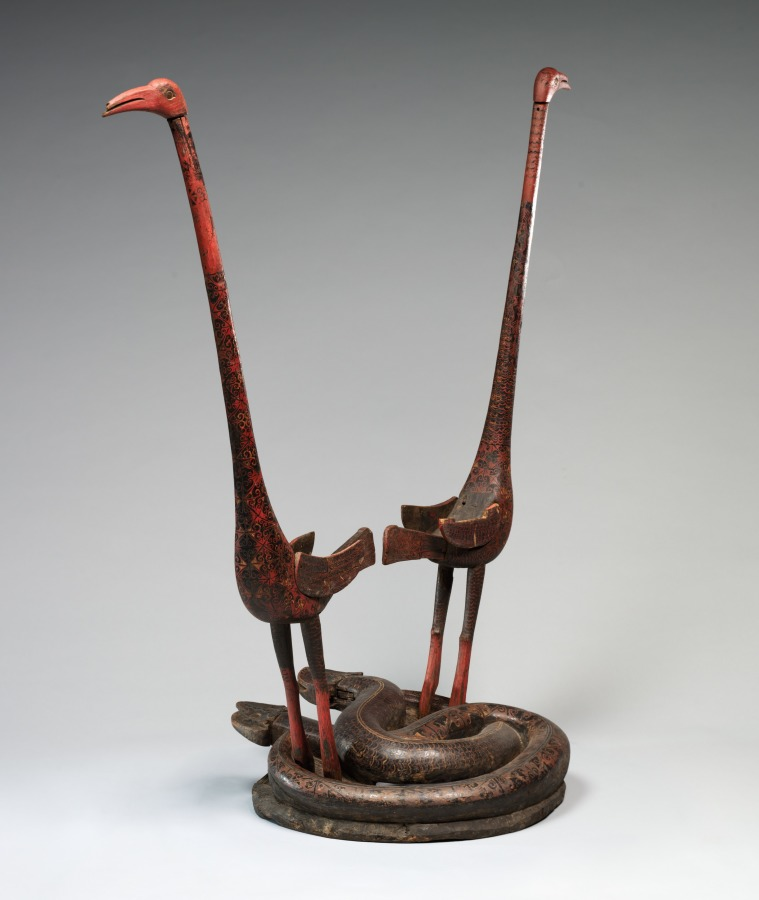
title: Cranes and Serpents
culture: China, reportedly from Hunan province, Changsha, Warring States period (475–221 BCE), State of Chu (c. 1046–223 BCE)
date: 475–221 BCE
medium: lacquered wood with polychromy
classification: Sculpture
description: A different style of ritual art developed in the state of Chu in South China. In addition to bronze vessels, lacquered wood artifacts expanded the repertory of ritual implements. This extraordinary sculpture was probably a drum stand for supporting a suspended drum in ritual ceremonies. It is unique among other excavated drum stands of the Chu, which typically show two birds standing on tigers. The theme of the bird stepping on the serpent was common in the Chu visual culture. Yet the slender proportions and seemingly flimsy structure of this particular set raise the question of whether it was utilitarian or mostly served symbolic functions in the tomb. The birds' and serpents' bodies have designs painted in red lacquer and yellow pigment against the black lacquer. Scientific analyses confirm the additional use of a blue or green pigment that has been discolored over time.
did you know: The cranes' long necks allowed a lightweight drum to be suspended from strings through the beaks, while the densely intertwined snakes provided a weighty base to stabilize the object during musical performances.